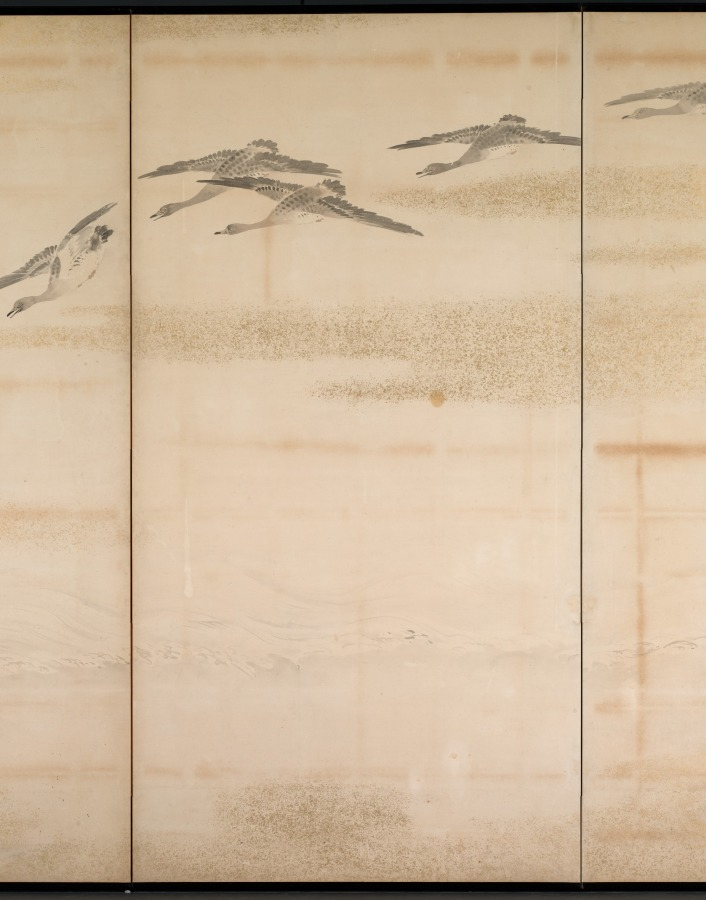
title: Geese, Reeds and Water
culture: Japan, Edo period (1615–1868)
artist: Yamamoto Baiitsu (Japanese, 1783–1856)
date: 1800s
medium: One of a pair of four-panel folding screens; ink, color, and cut gold foil on paper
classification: Painting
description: This byōbu composition differs from most in that it comprises two four-panel screens, rather than two six-panel units. Since the current mounting is modern, it is impossible to determine whether its present configuration represents its original design. Some panels may have been removed to help the screens better fit into a modern interior space. Baiitsu worked almost exclusively in monochromatic ink tones and favored classical Chinese painting themes.